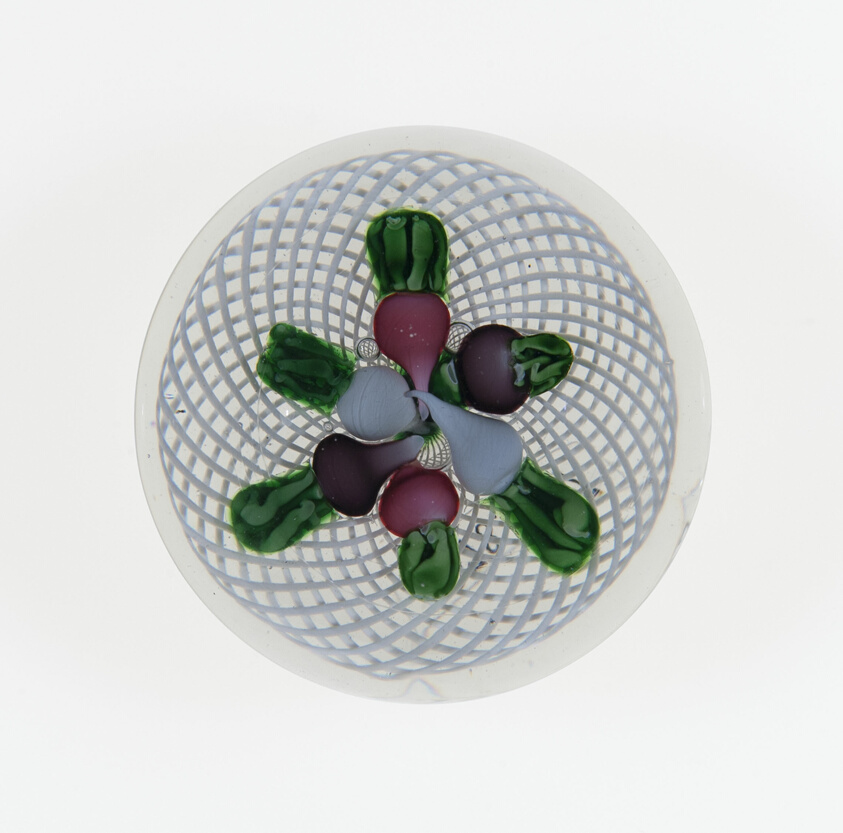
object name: Glass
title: Paperweight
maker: Saint-Louis Glassworks (Cristalleries de Saint-Louis); Lorraine, France, founded 1586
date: c. 1848–55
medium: Glass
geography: Saint-Louis-lès-Bitche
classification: paperweight; lampwork; european decorative arts; glass